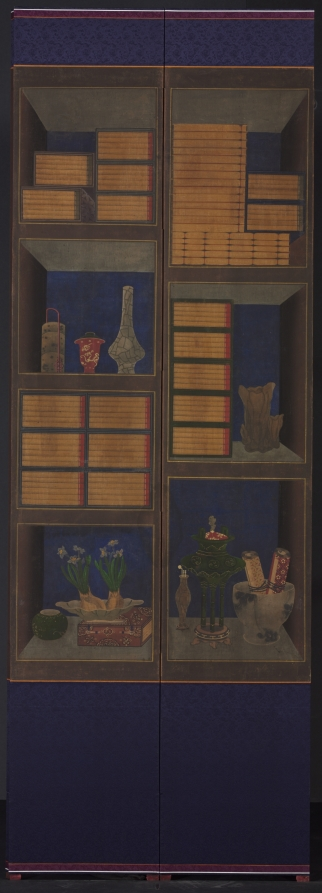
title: Books and Scholars’ Accoutrements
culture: Korea, Joseon dynasty (1392–1910)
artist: Yi Taek-gyun (Korean, 1808–after 1883)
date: late 1800s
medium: ten-panel folding screen; ink and color on silk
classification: Painting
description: First produced around the second half of the eighteenth century, chaekgado (literally, “pictures of bookshelves”) flourished throughout the 1800s as a royal emblem. And soon this pictorial genre became a popular furnishing item for aristocrats' elegant studies. The third panel from the right bears a hidden seal that reveals the artist: Yi Taek-gyun, a prominent court artist active in the late 1800s.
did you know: A convincing hypothesis that connects the Korean chaekgado tradition with the Renaissance tradition of illusionistic studiolo through the technique of trompe-l'œil and Chinese Qing period treasured cabinet paintings was first made in Park Shim-eun's thesis (2002).